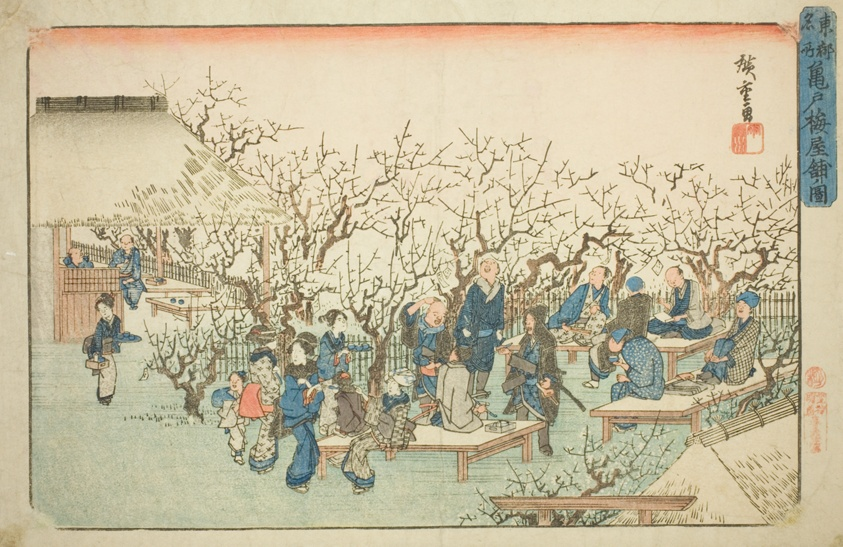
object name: Print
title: The Plum Garden at Komeido (Kameido ume yashiki no zu), from the series "Famous Places in the Eastern Capital (Toto meisho)"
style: Japanese (culture or style)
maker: Utagawa Hiroshige 歌川 広重; Japanese, 1797-1858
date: c. 1832/38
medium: Color woodblock print; oban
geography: Japan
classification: woodblock print; print; asian art